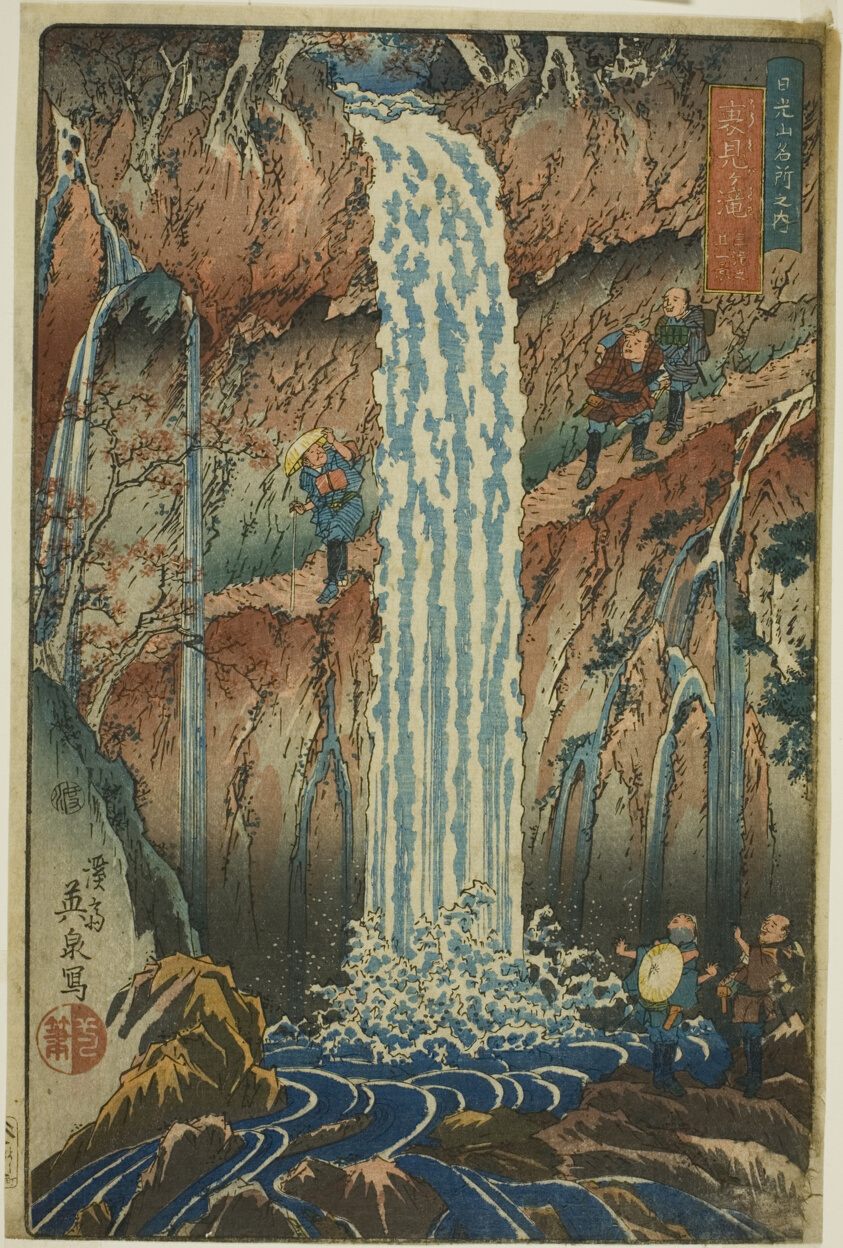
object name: Print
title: Backward-viewing Falls, One of the Three Waterfalls (Urami-ga-taki, santaki no sono ikkei), from the series "Famous Scenic Spots in the Mountains of Nikko (Nikkosan meisho no uchi)"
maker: Keisai Eisen (Japanese, 1790–1848)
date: 1843–1847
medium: Color woodblock print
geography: Japan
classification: woodblock print; print; asian art